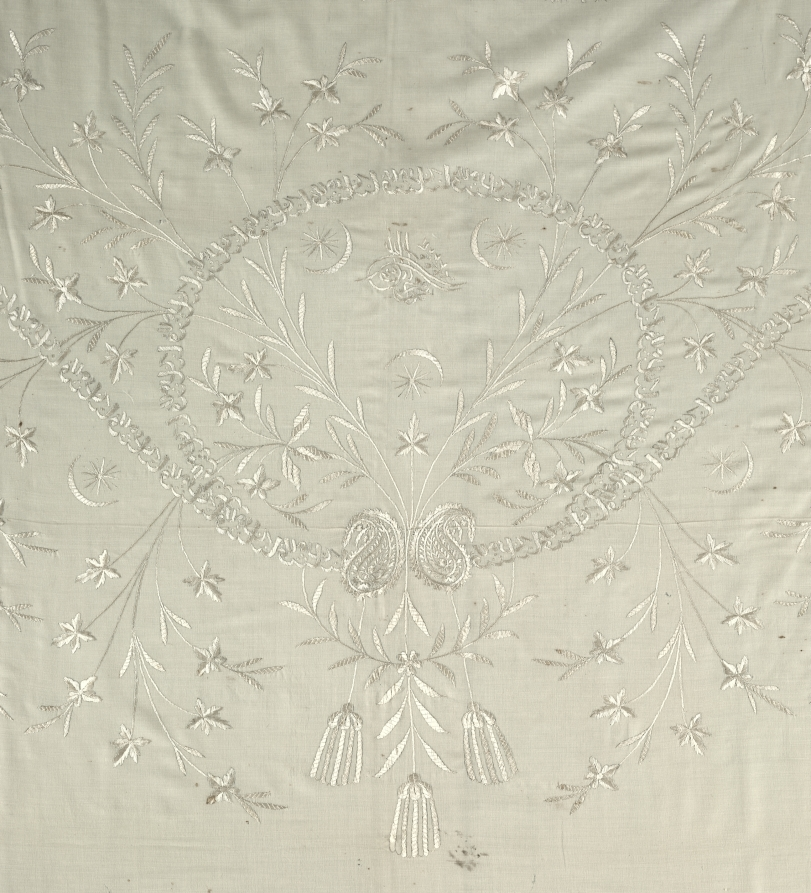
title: Embroidered Robe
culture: Turkey, 19th century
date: 19th century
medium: embroidery; silk on wool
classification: Garment